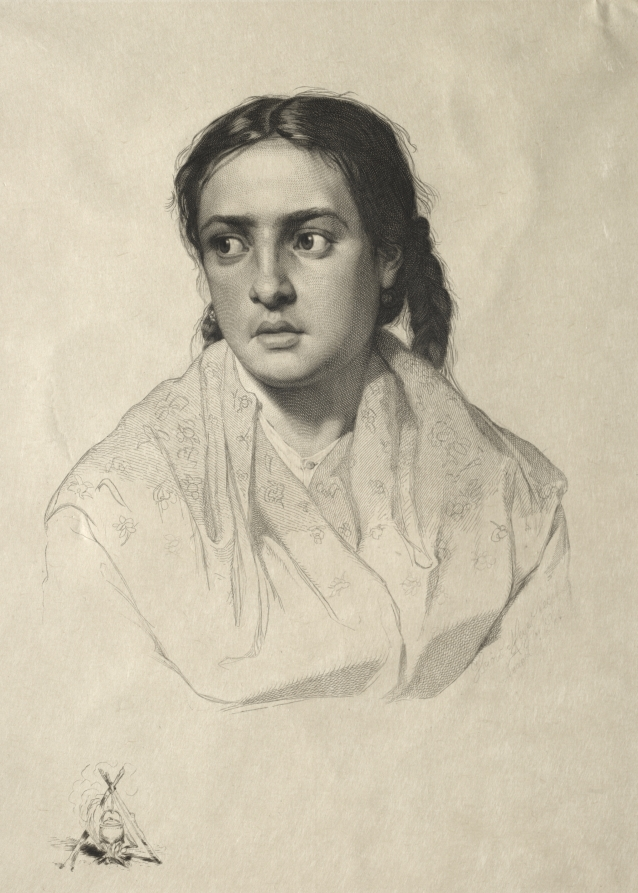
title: Head of a Girl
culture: Germany, 19th century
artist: Hans Meyer (German, 1846–1919)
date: 1870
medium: engraving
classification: Print